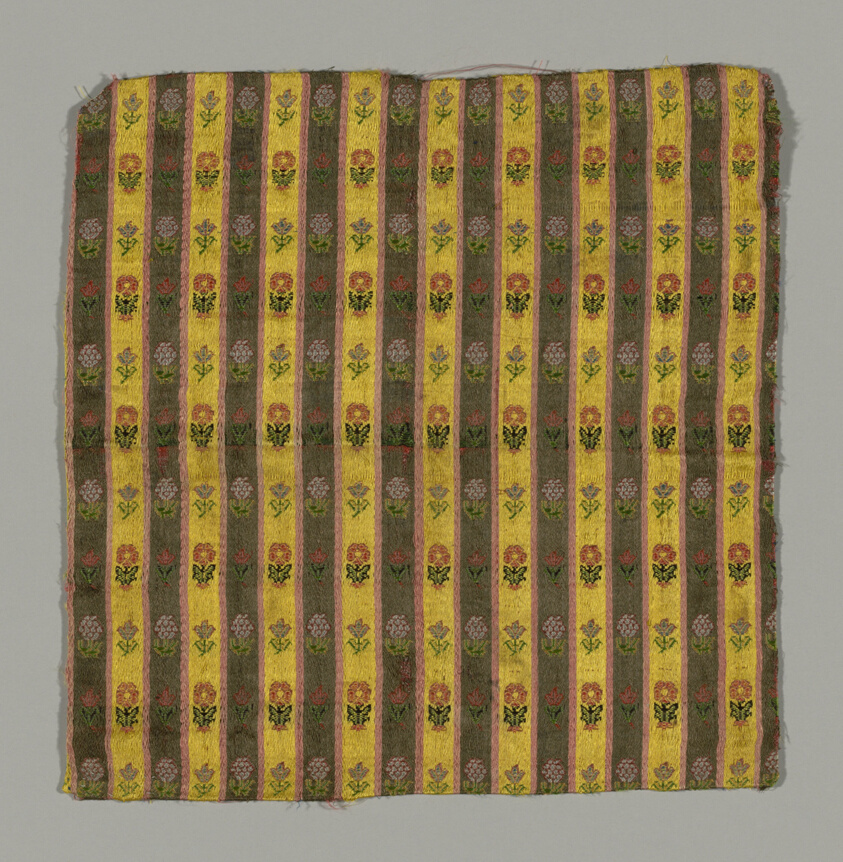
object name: Textile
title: Fragment (Dress Fabric)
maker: Iran (Persia)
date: 18th/19th century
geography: Persia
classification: textile; weaving